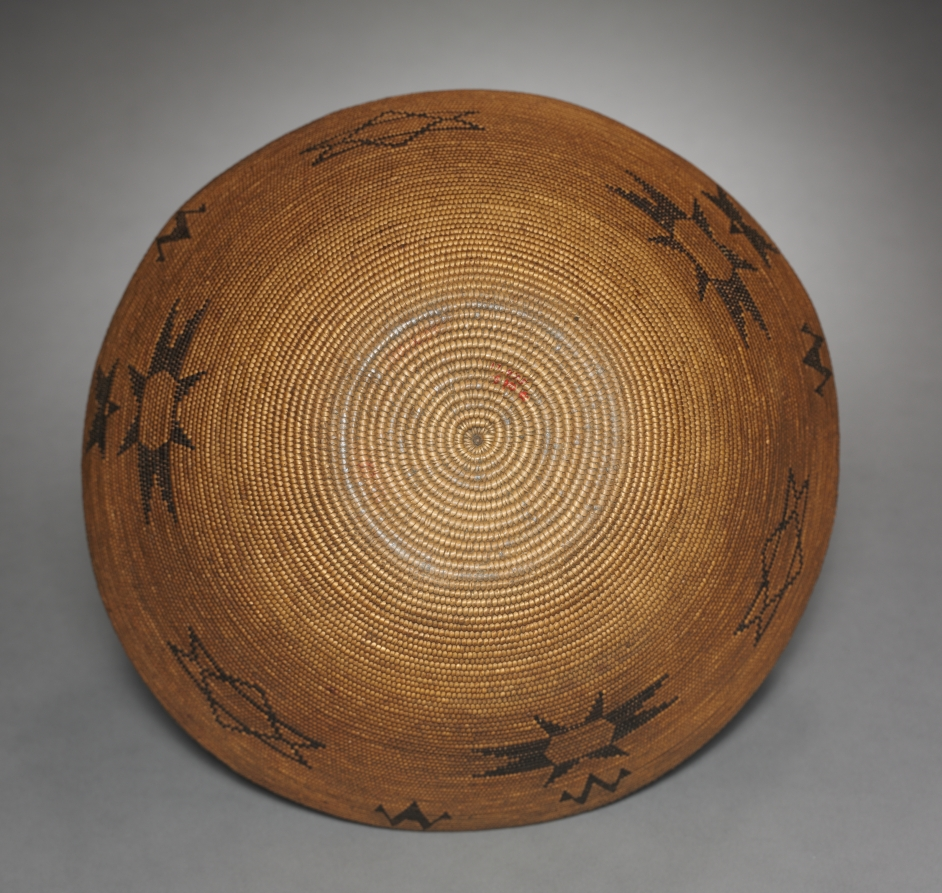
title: Cooking Bowl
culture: Great Basin, Washoe, late 19th- early 20th century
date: 1890s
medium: Willow, Bracken fern root; coiled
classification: Basketry